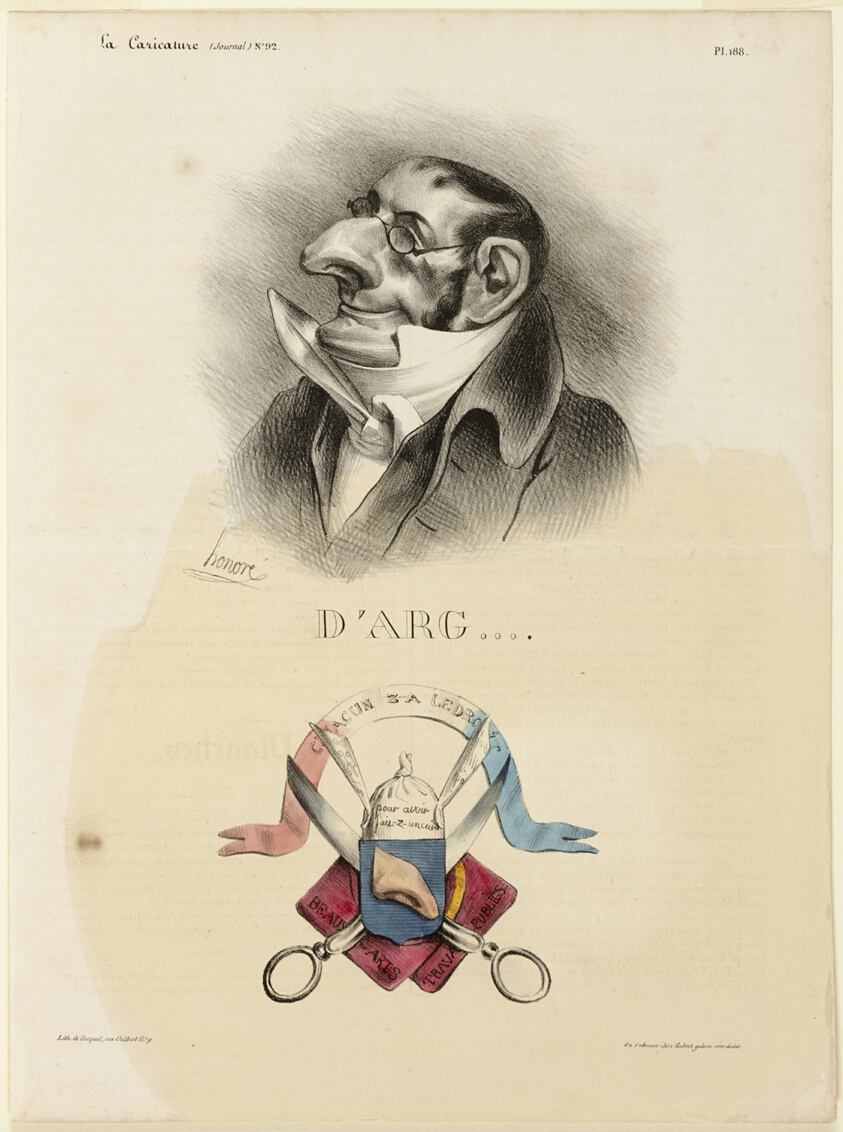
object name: Print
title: D'Arg...., plate 188 from Célébrités de la Caricature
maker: Honoré Victorin Daumier; French, 1808-1879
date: 1832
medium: Lithograph in black, with hand coloring, on ivory wove paper, fixed (fixative discolored to yellow)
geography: France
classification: lithograph; print; prints and drawing